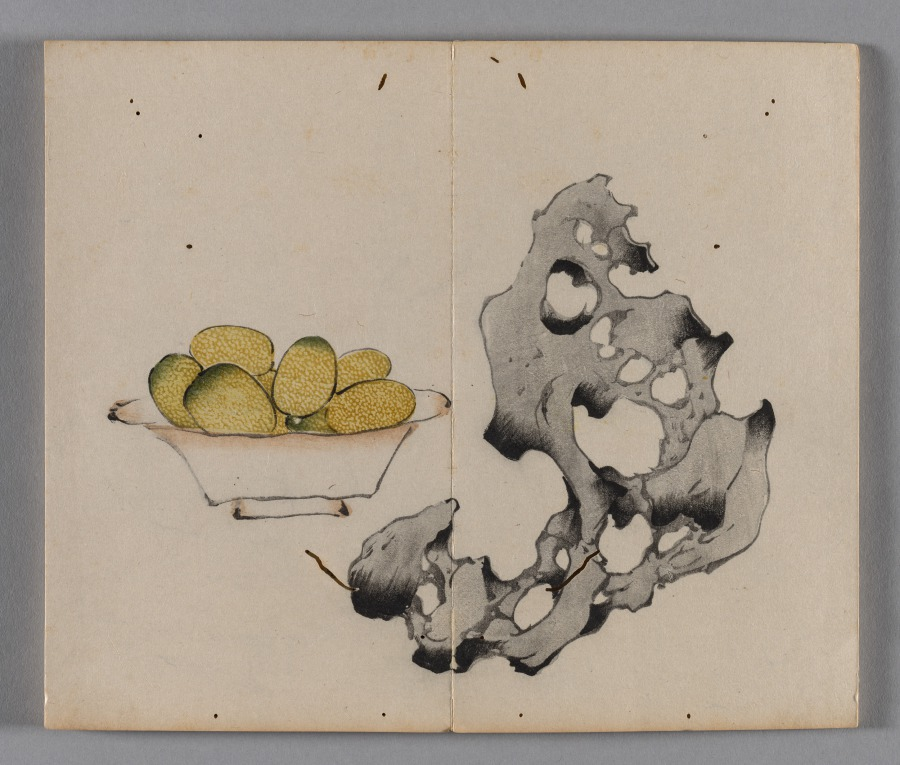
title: Ten Bamboo Studio Painting and Calligraphy Handbook (Shizhuzhai shuhua pu): Fruit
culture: China, Qing dynasty (1644-1911)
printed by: Hu Zhengyan (Chinese, c. 1584–1674)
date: 1633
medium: Woodblock-printed book; ink and colors on paper; first edition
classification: Print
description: Color printing reached a level of perfection in the early 1600s, as seen in this Ten Bamboo Studio Collection of Calligraphy and Painting and the Mustard Seed Garden Manual of Painting (printed 1679 and 1701). The painterly quality, precision in registering (aligning) the woodblocks, and harmonious colors made them the most successful color print editions in Chinese history. Both editions were printed and compiled in Nanjing, spread nationwide, and had a great impact on the arts in Japan and Korea.